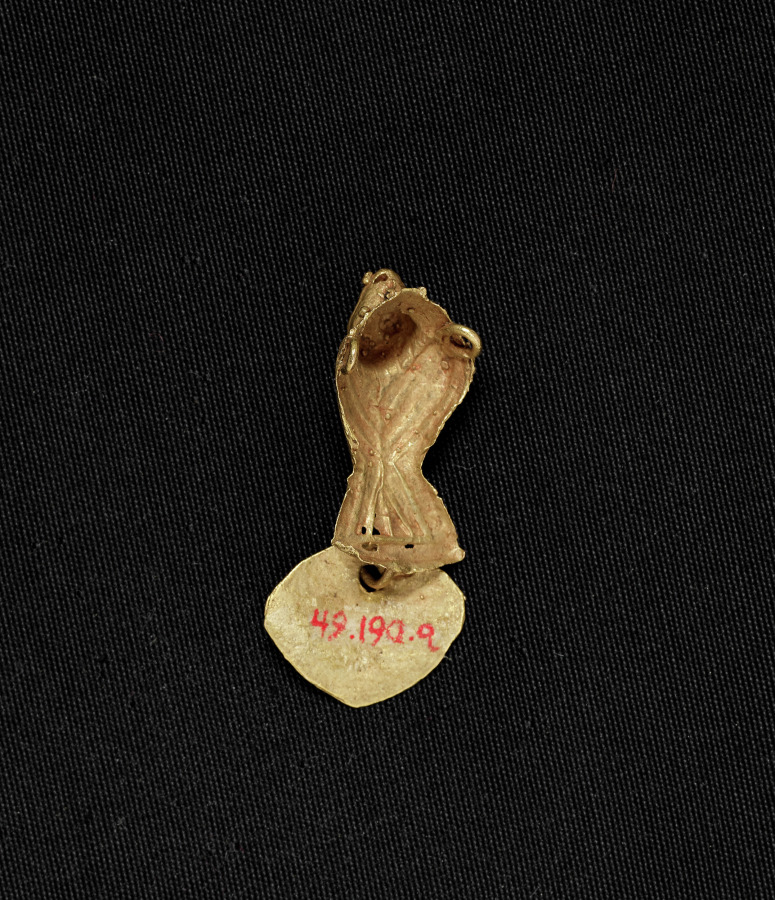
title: Bird Bead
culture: Colombia, Muisca style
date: c. 900–1550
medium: cast gold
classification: Jewelry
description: Muisca metalwork divides into two categories: ornaments to be worn, such as these, and offering figurines, in the case to the right. The elaborate bird pendant features delicate herringbone moldings, openwork patterns, and wing details-all part of the wax model from which the pendant was cast (see nearby computer animation). The dangles were attached after casting.